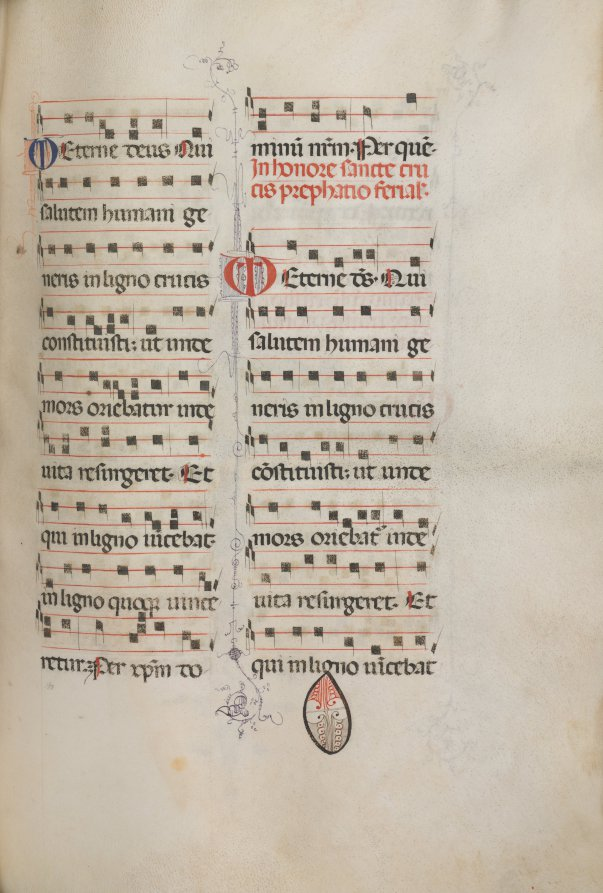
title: Missale: Fol. 182: Music for various ordinary prayers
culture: Italy, Perugia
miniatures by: Bartolommeo Caporali (Italian, c. 1420–1503)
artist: assisted by Giapeco Caporali (Italian, d. 1478)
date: 1469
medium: ink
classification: Bound Volume